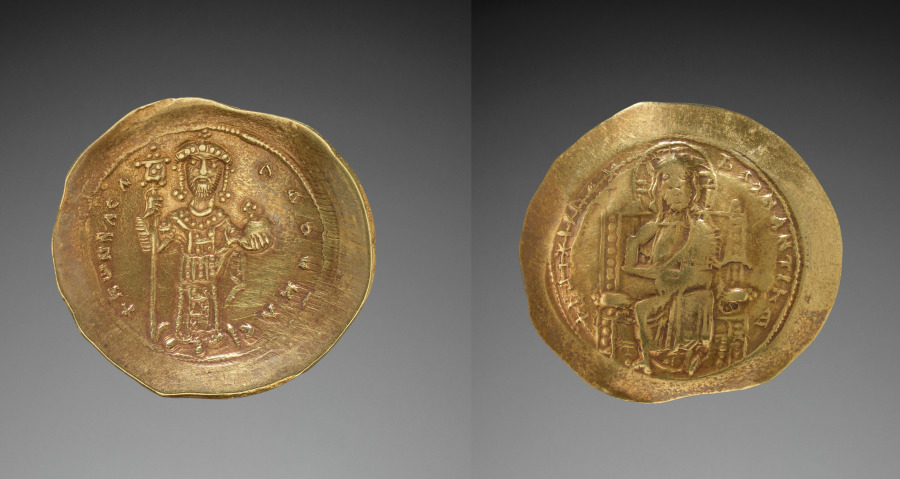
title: Scyphate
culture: Byzantium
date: 1059–1067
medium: gold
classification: Coins